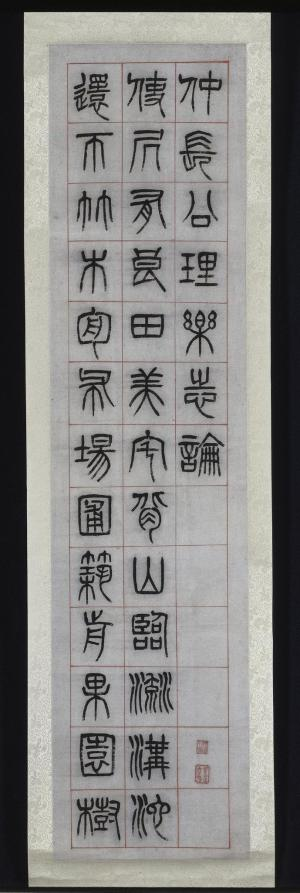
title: On Happiness, Calligraphy in Seal Script Style (zhuanshu)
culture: China, Changsu, Qing dynasty (1644-1911)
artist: Yang Yisun (Chinese, 1813–1881)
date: 1871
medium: hanging scroll, ink on paper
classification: Painting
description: Yang Yisun transcribed this ancient text on six narrow scrolls, starting at the top right and ending at the bottom left. Yang emphasizes the text’s historic nature by using the seal script style found on stone steles and bronze vessels. On Happiness features reflections of a scholar on a leisurely life in the countryside, composed by Han dynasty official Zhongchang Tong, who died the year the Han dynasty collapsed (AD 220). The idyllic life described in the text may bean evocation of the past in a time of national crisis. A decade before Yang wrote these scrolls, Anglo- French forces had looted and burned the Summer Palace in Beijing. At the same time, the domestic Taiping rebellion (1850–64), led by a religious fanatic to overthrow the Qing government, had devastated Yang’s homeland, the Jiangnan region, with an estimated 20 million lives lost.